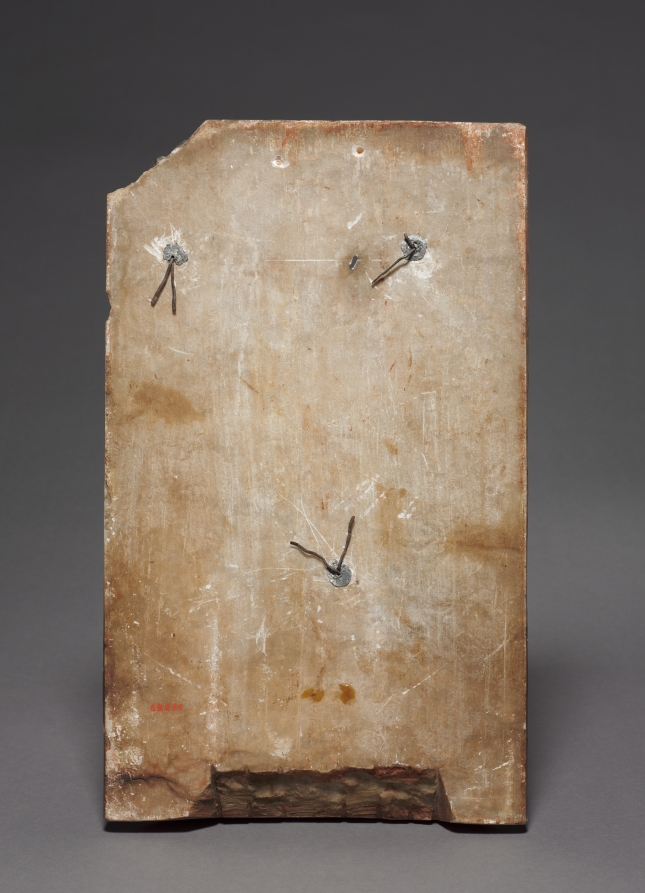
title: Christ Carrying the Cross (Panel from an Altarpiece)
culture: England, Nottingham, 15th century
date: 1400s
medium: painted and gilded alabaster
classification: Sculpture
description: This panel, most likely one of five narrative scenes representing the Passion of Christ, comes from a now dismembered altarpiece. The central panel was undoubtedly a scene of the Crucifixion. Such carvings in alabaster were frequently painted in vibrant colors with added gilding. The flesh areas of the figures were often left unpainted, with the exception of villains and executioners whose faces were "blackened," as in this example, a convention that may derive from the medieval stage. English alabaster sculptures were in high demand throughout Europe during the 1300s and 1400s, and exported to Portugal, Spain, Scandinavia, Iceland, and other countries. A soft stone suitable only for interior sculpture, English alabaster was highly prized for its creamy translucency. Of the English quarries, those near Nottingham in the Midlands were the most active.